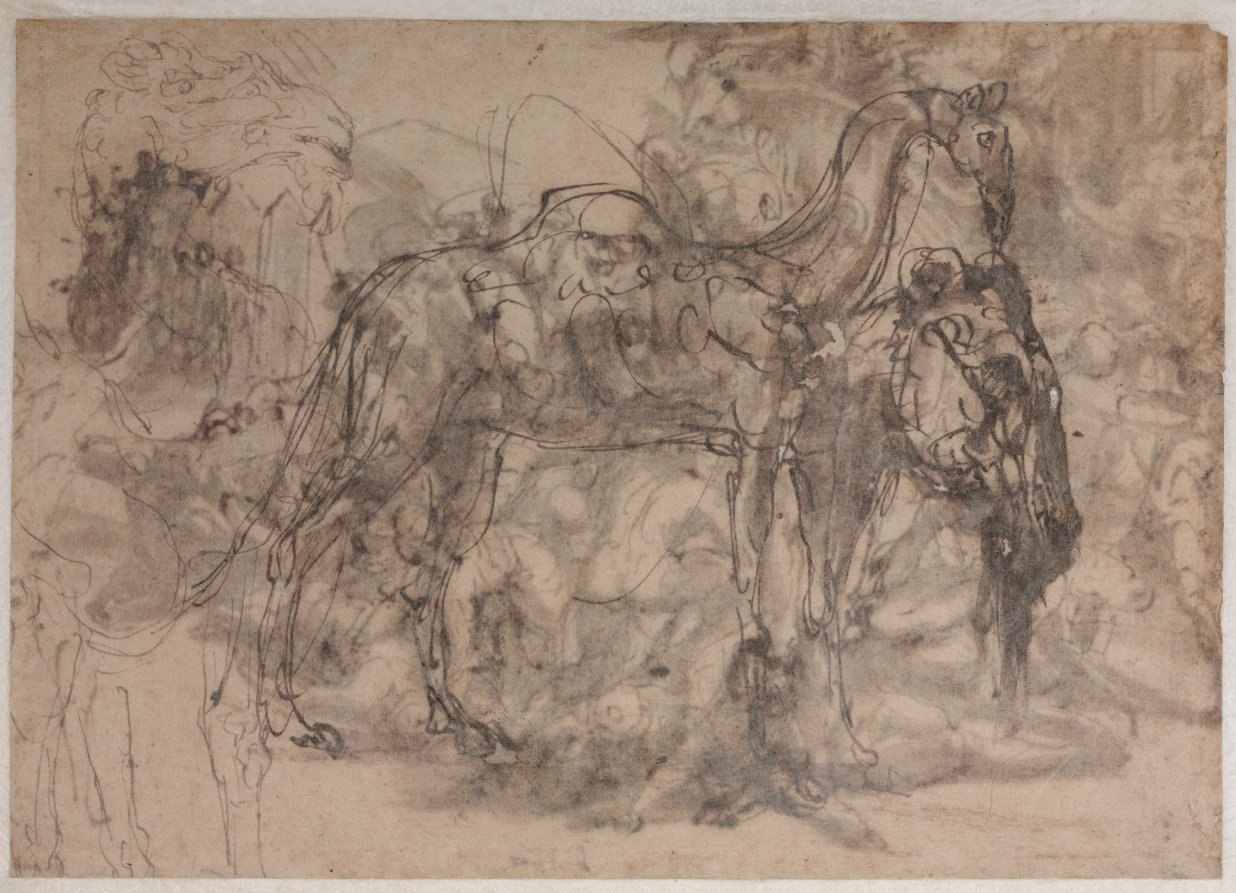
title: Sketches of Animals (verso)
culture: Italy, 16th century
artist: Perino del Vaga (Italian, 1501–1547)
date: c. 1545/47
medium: pen and brown ink (iron gall) and brush and brown wash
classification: Drawing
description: Perino del Vaga made this spirited pen and ink and wash drawing as a preliminary sketch for a fresco cycle depicting the military campaigns of Alexander the Great, intended for the apartments of Pope Paul III in the Castel Sant’Angelo in Rome. At the time, he was also working on commissions at the Vatican Palace where he studied and drew from the frescoes of Michelangelo in the Sistine Chapel. One pose in the drawing, that of the man in front who, sword poised over his head, prepares to strike a man below, was probably inspired by Michelangelo’s rendering of David and Goliath on the ceiling. Perino adapted the violent pose for a military rather than biblical subject, filling out the scene with trumpeting elephants and a pile of soldiers in combat. On the verso of the sheet, Perino drew a quick sketch of a standing camel and another, closer view of the animal's head and legs.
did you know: This artist was in Rome in 1527 when the troops of Charles V sacked the city, and was imprisoned and forced to pay a heavy ransom for his, his wife's, and his daughter's safe release.